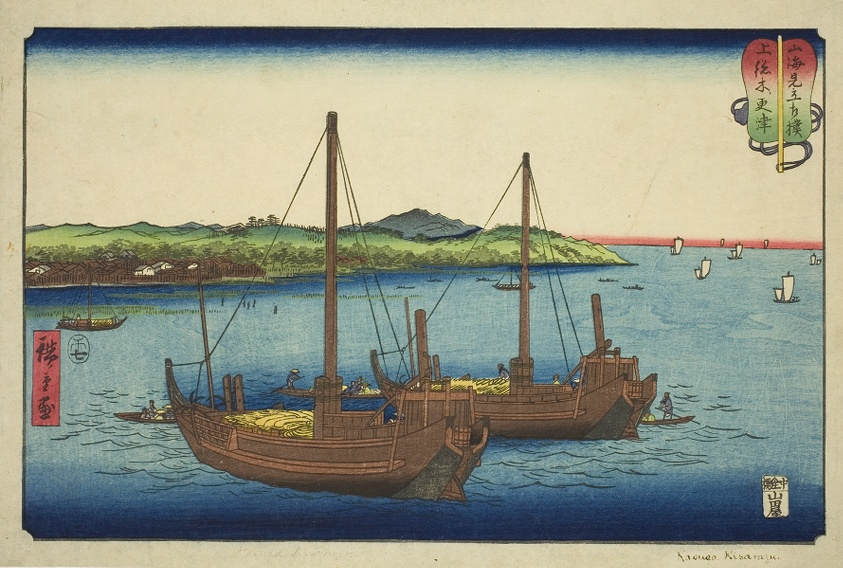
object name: Print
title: Kisarazu in Kazusa Province (Kazusa Kisarazu), from the series "Wrestling Matches between Mountains and Seas (Sankai mitate zumo)"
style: Japanese (culture or style)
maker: Utagawa Hiroshige 歌川 広重; Japanese, 1797-1858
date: 1858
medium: Color woodblock print; oban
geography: Japan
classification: woodblock print; print; asian art